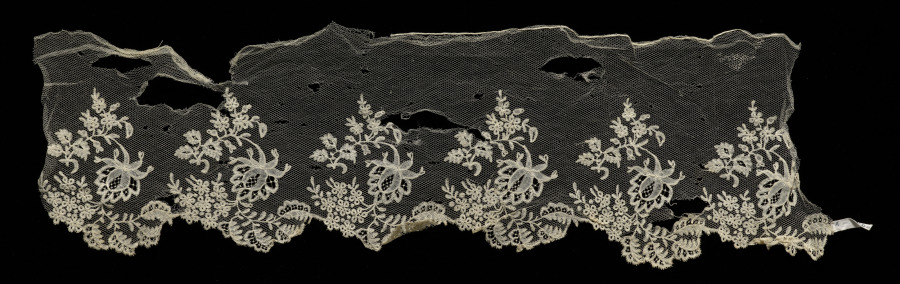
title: Lace Flounce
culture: Belgium, Brussels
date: 1800s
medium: Bobbin lace (point plat appliqué) applied to machine-made net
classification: Lace